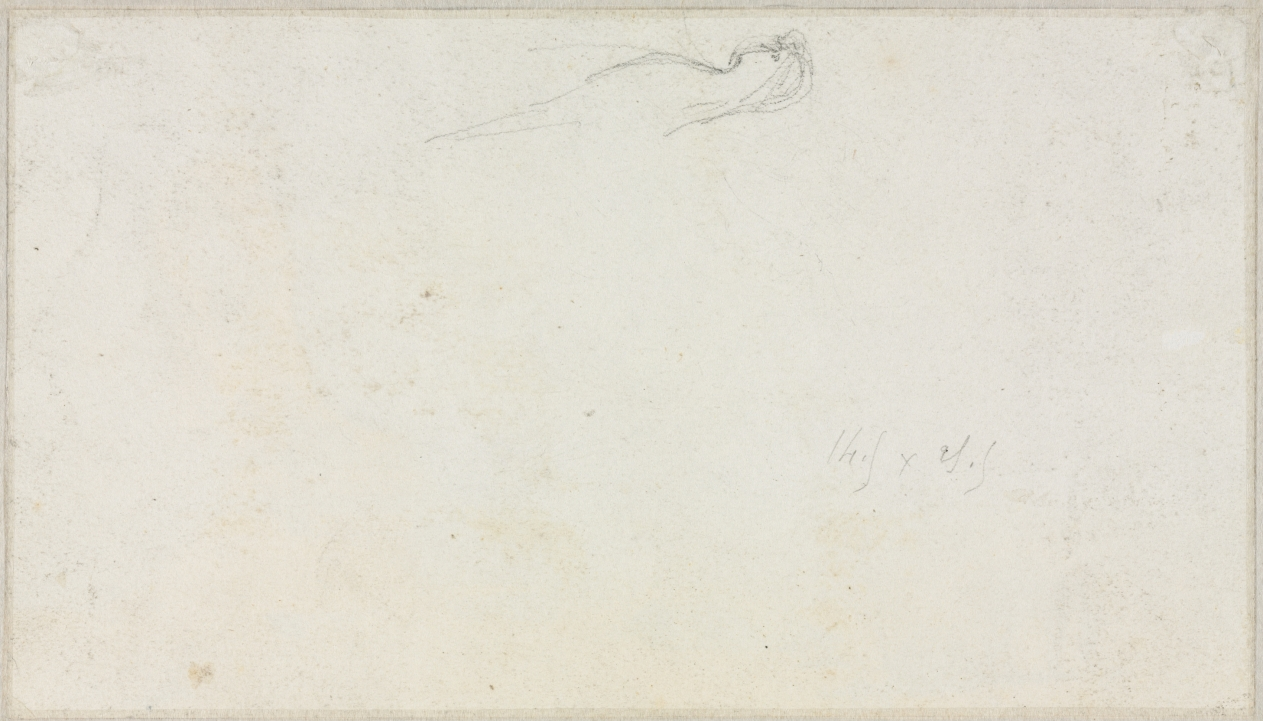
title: Sketch of a Sphinx [?] (verso)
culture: France, 19th century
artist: Luc-Olivier Merson (French, 1846–1920)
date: c. 1879–80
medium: black chalk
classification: Drawing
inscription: upper right, in graphite: [8?].86 x [8?].[7?]1 [sideways]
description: This drawing relates to Luc-Olivier Merson's Rest on the Flight into Egypt, among the most popular paintings exhibited at the 1879 Paris Salon. This dream-like, highly unusual image from the familiar bible story shows Mary and Christ resting peacefully in the arms of a Sphinx, while Joseph sleeps near their dwindling fire. In the wake of its extraordinary success, Merson made several painted replicas of the work. Here, the composition is identical, but reversed, suggesting that it may have been an alternative version of the canvas.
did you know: It is possible that this drawing served as a model for a print, but the best-known printed reproduction of the painting differs from the sheet in several minor details.